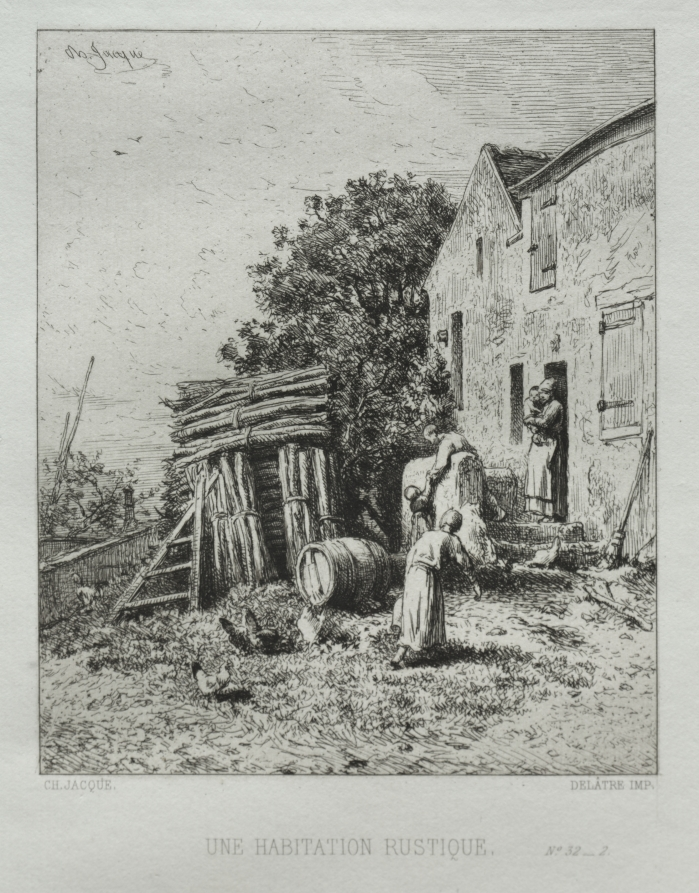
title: Rustic House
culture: France, 19th century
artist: Charles-Émile Jacque (French, 1813–1894)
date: 1865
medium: etching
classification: Print